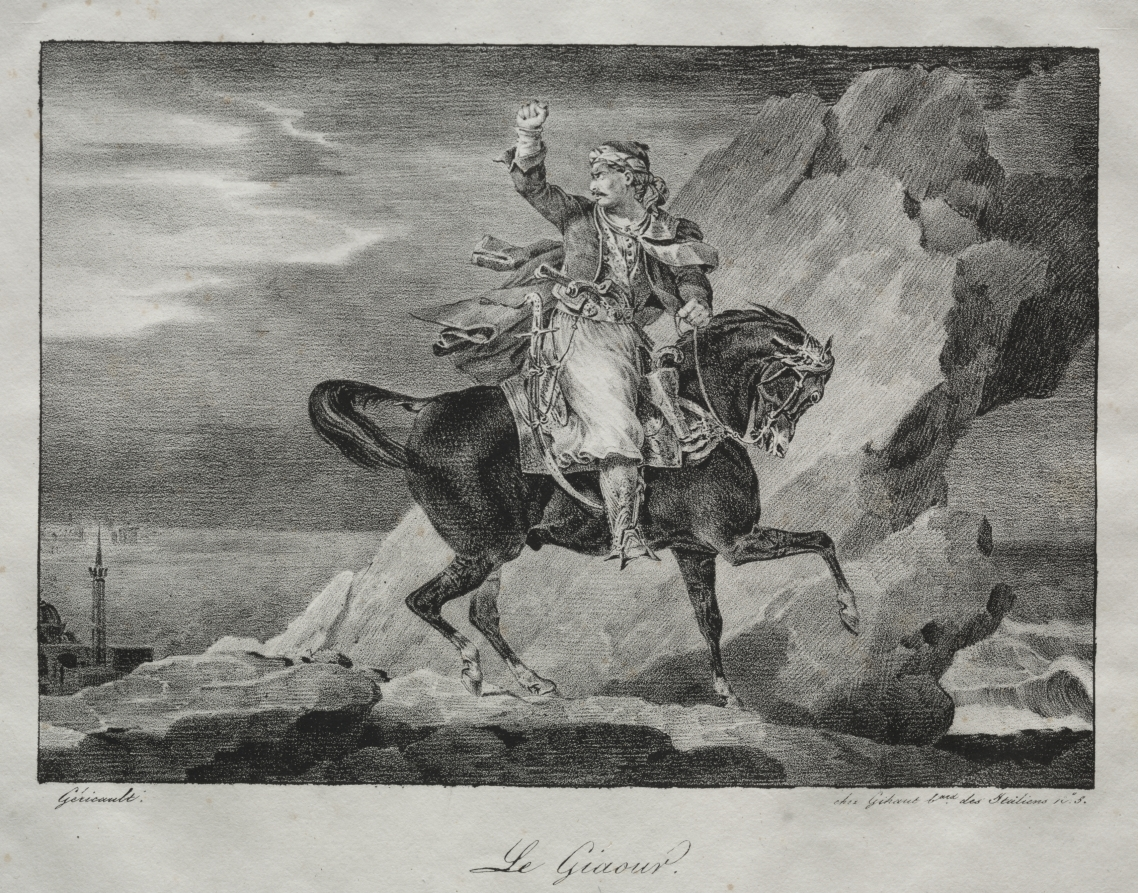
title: The Giaour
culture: France, 19th century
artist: Théodore Géricault (French, 1791–1824)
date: 1820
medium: lithograph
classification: Print